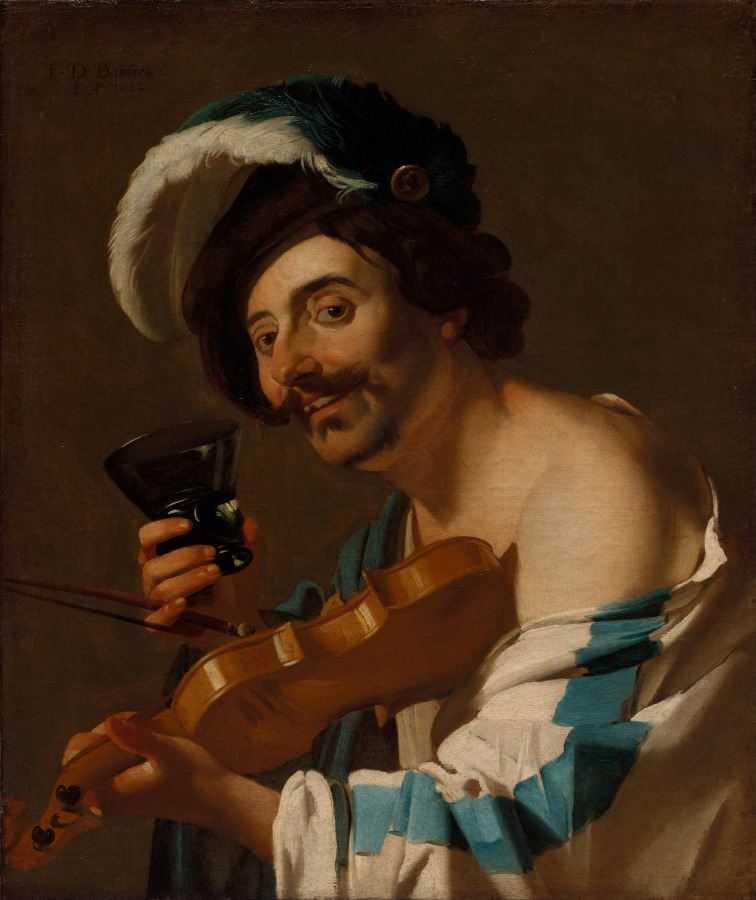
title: Violin Player with a Wine Glass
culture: Netherlands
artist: Dirck van Baburen (Dutch, c. 1595–1624)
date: 1623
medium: Oil on canvas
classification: Painting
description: Baburen, a native of Utrecht, was among the first to introduce Caravaggio’s revolutionary style to the Netherlands. Half-length figures positioned close to the picture plane project a lively spontaneity. This musician’s loose, colorful dress marks him as a figure at the edges of society, unbound by behavioral norms—associations enhanced by his bold gaze, unshaven face, and cheeky grin complete with broken tooth.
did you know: Other paintings by Utrecht artists feature the same model, whose extravagant mustache and broken tooth make him instantly recognizable.